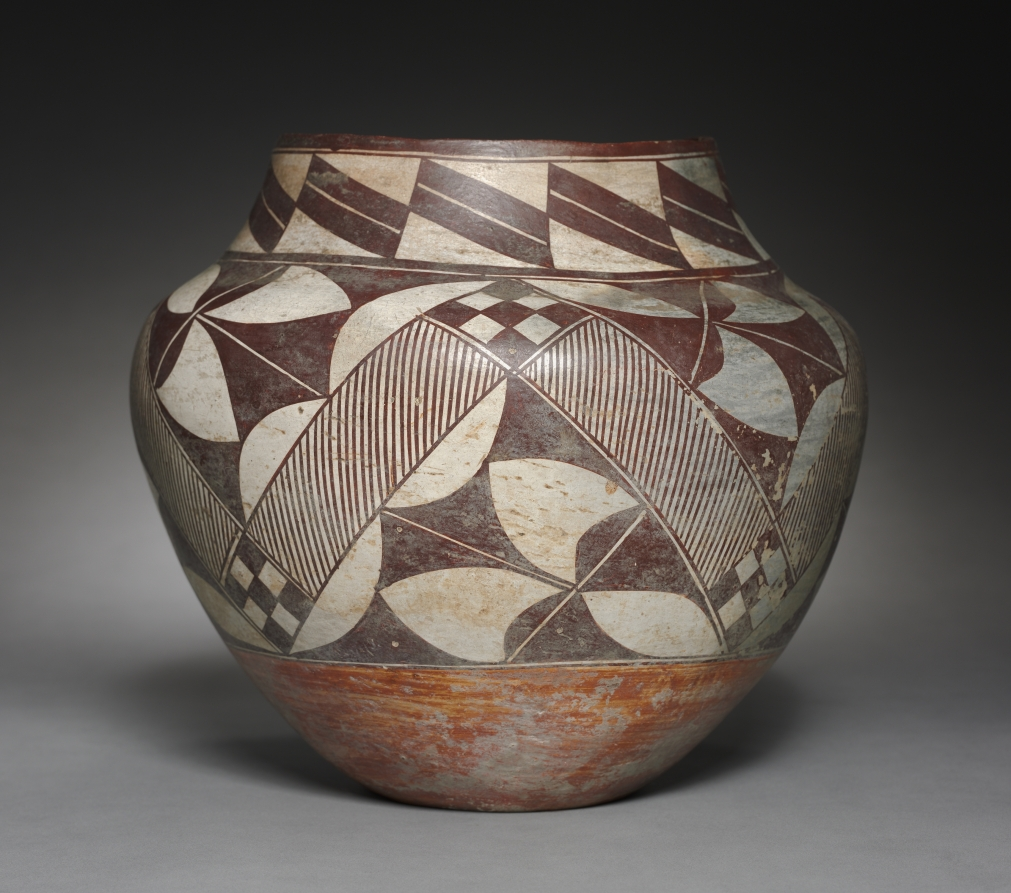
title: Water Jar (Olla)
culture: Native North America, Southwest, New Mexico, Acoma Pueblo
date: 1880s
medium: ceramic, slip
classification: Ceramic